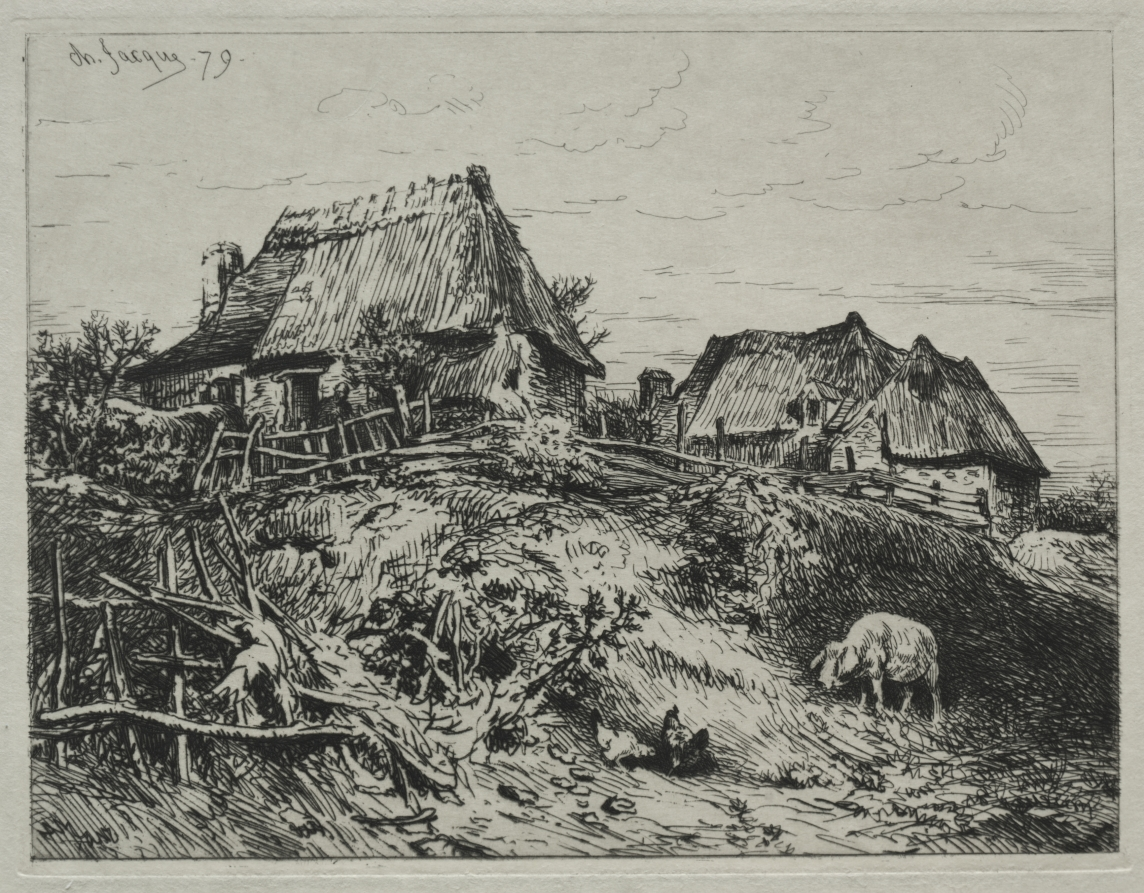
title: Two Cottages on a Bank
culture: France, 19th century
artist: Charles-Émile Jacque (French, 1813–1894)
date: 1879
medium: etching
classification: Print